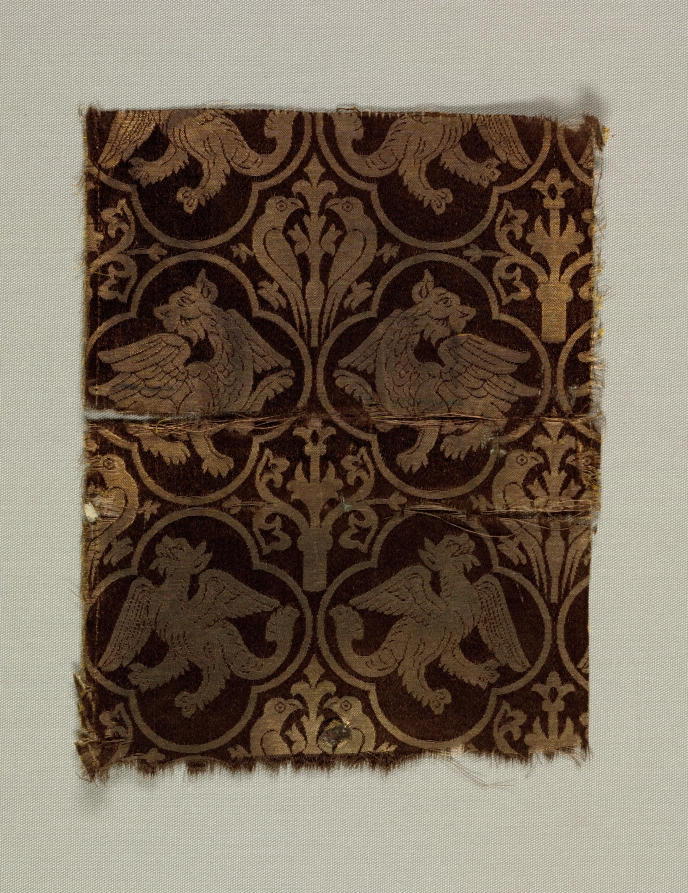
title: Fragment of a Textile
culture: France, early 20th century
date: early 1900s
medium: damask; silk and gold filé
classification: Textile